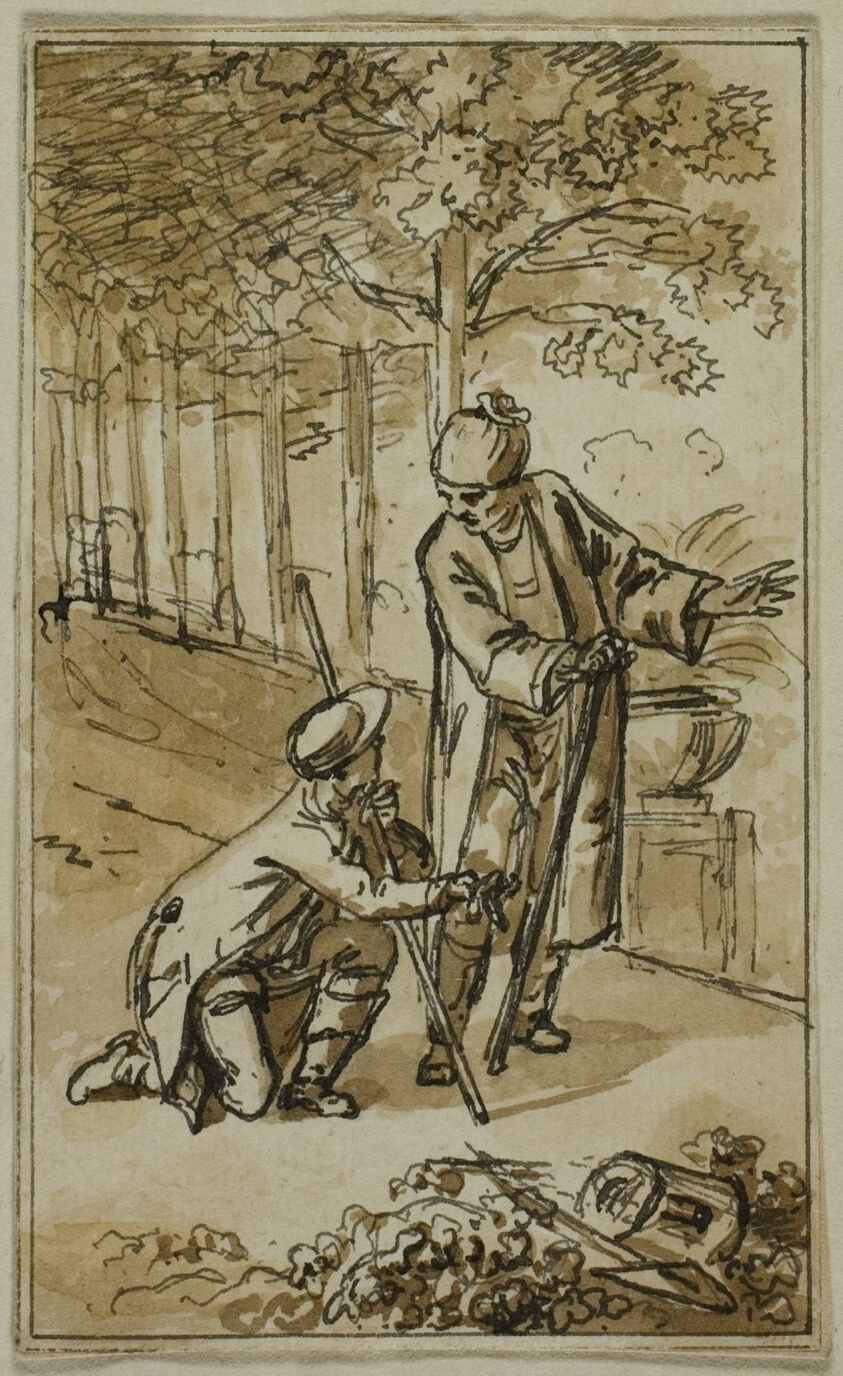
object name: Drawing and Watercolor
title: Literary Illustration: Gentleman and Kneeling Gardener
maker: Jacob Wilhelm Mechau (German, 1745-1808); or Johann Friedrich Mechau (German, 1776-1854)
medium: Pen and black ink and brush and brown wash, on ivory laid paper, laid down on card, laid down on cream wove paper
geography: Germany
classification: pen and ink drawings; drawings (visual works); prints and drawing